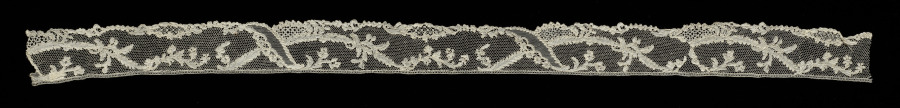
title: Lace Edging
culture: France, Argentan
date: 1715–74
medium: Linen: needle lace (Point de Argentan)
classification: Lace